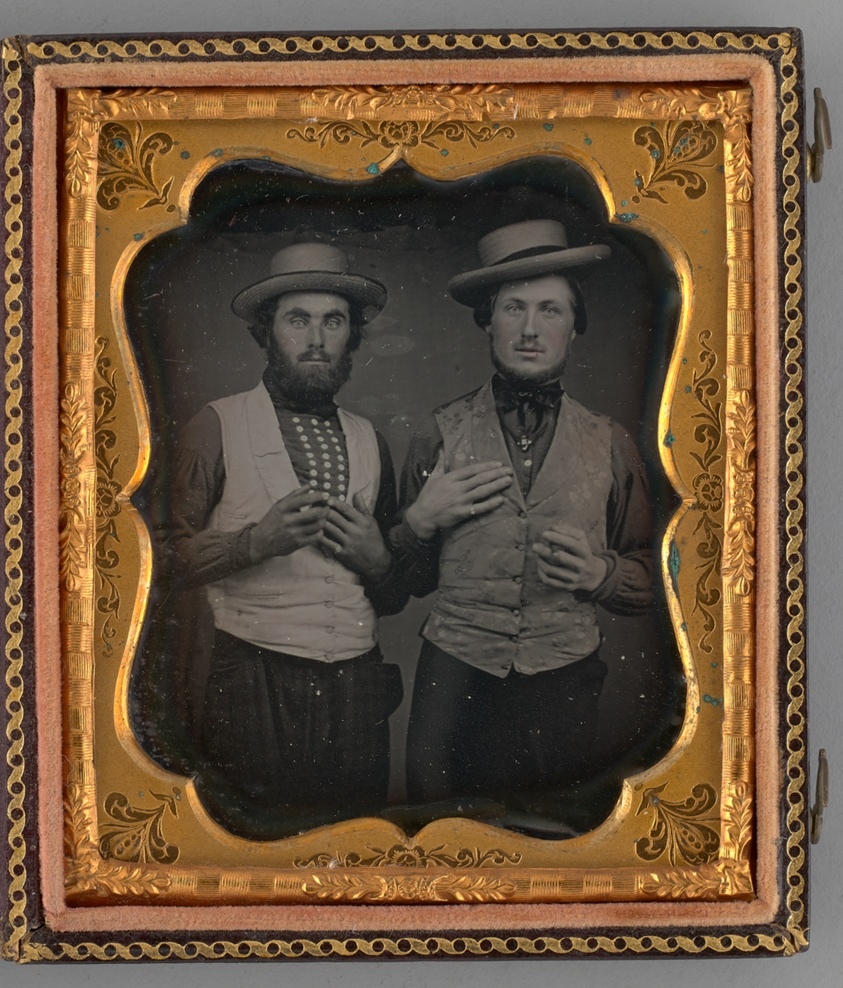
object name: Photograph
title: Untitled (Portrait of Two Men Wearing Straw Hats)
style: 19th century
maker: Unknown maker; American, 19th century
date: 1855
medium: Daguerreotype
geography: United States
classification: portrait; photograph; photographic process; photography; portrait; daguerreotype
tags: lundberg collection, portraits, Male, portraits: male subject, portraits: multiple subjects